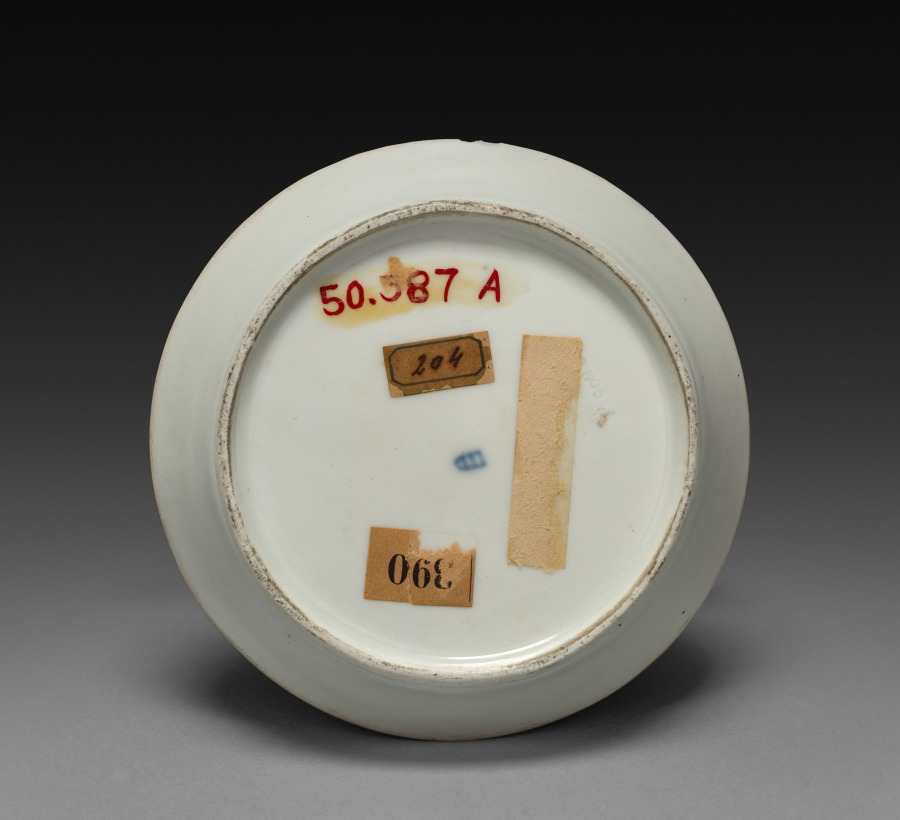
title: Saucer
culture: Austria, Vienna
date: c. 1800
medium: porcelain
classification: Ceramic